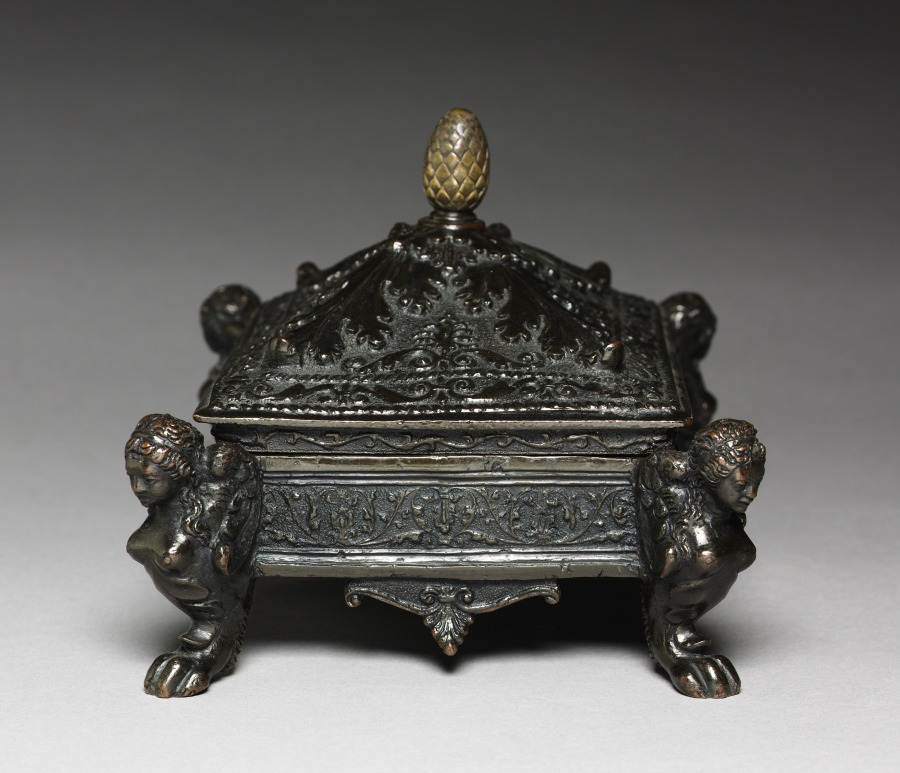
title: Writing Casket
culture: Italy, Ravenna, 16th century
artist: workshop of Severo da Ravenna (Italian, c.1496–c.1543)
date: c. 1525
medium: bronze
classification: Sculpture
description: The interior is divided into four compartments for storing writing implements and sand for blotting.